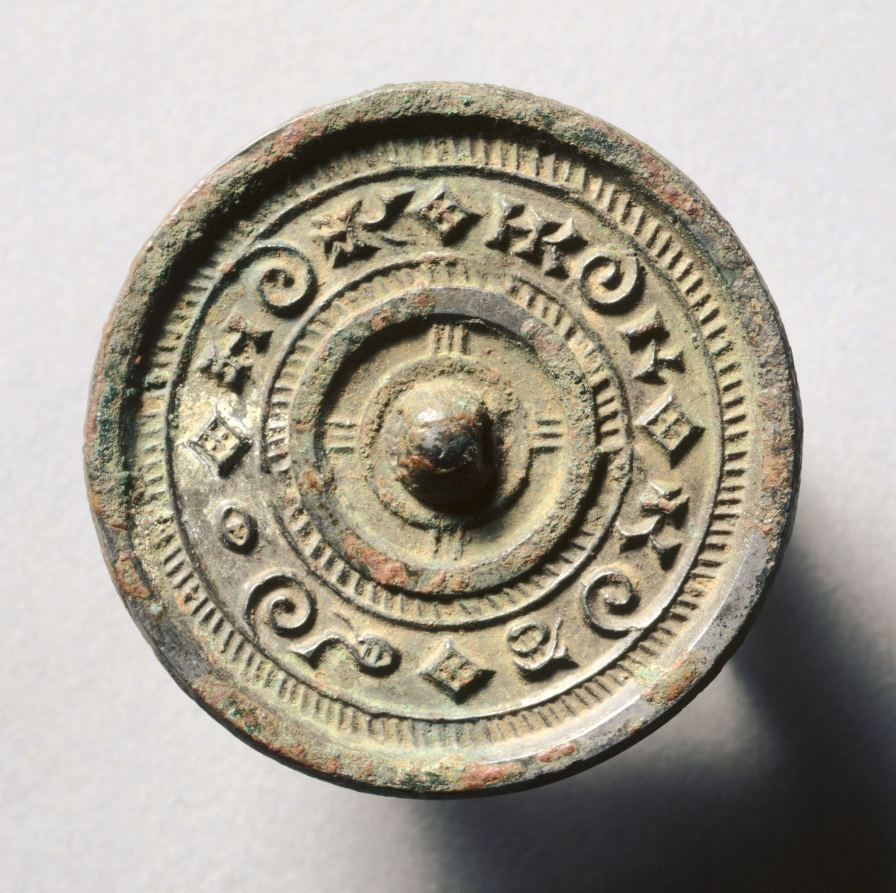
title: Mirror with Concentric Circles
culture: China, Western Han dynasty (206 BCE–8 CE)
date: late 300s BCE–50 CE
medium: bronze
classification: Metalwork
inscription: By the light of the sun, the world is made bright.